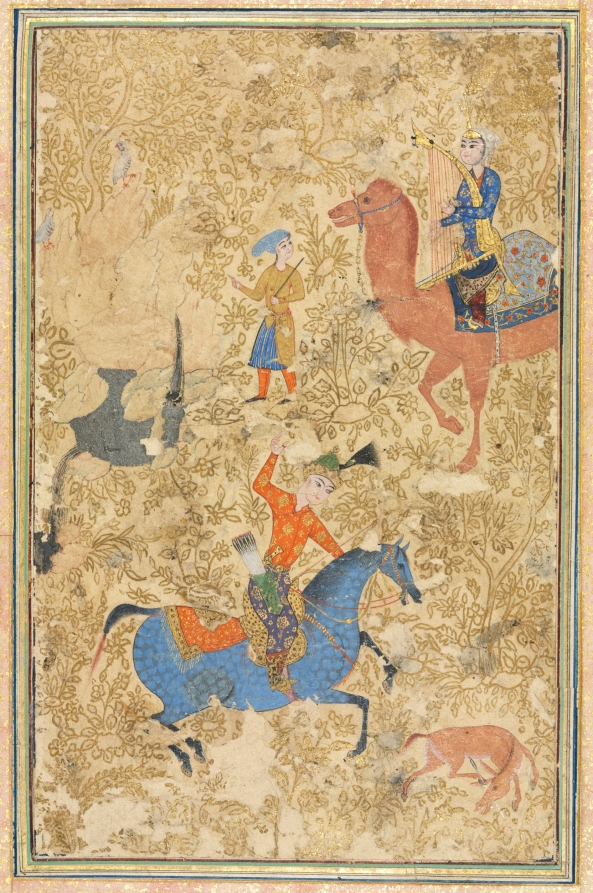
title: Bahram Gur and Azada, from a Shahnama (Book of Kings) of Firdausi (940–1019 or 1025)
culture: Iran, Tabriz or Qazvin, Safavid period (1501-1722)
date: 1500s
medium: opaque watercolor and gold on paper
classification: Manuscript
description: This image from an unfinished painting depicts one of the most popular episodes from the life of the pre-Islamic Persian king Bahram Gur (reigned 420–438 CE). A famed hunter, he was challenged by his concubine, Azada, to strike a donkey through its foot and ear with a single arrow. Azada is in the upper right playing the harp on a camel. Bahram Gur successfully meets her challenge at the bottom of the page; he tossed a rock into the donkey’s ear, then fired when the animal tried to kick it loose.